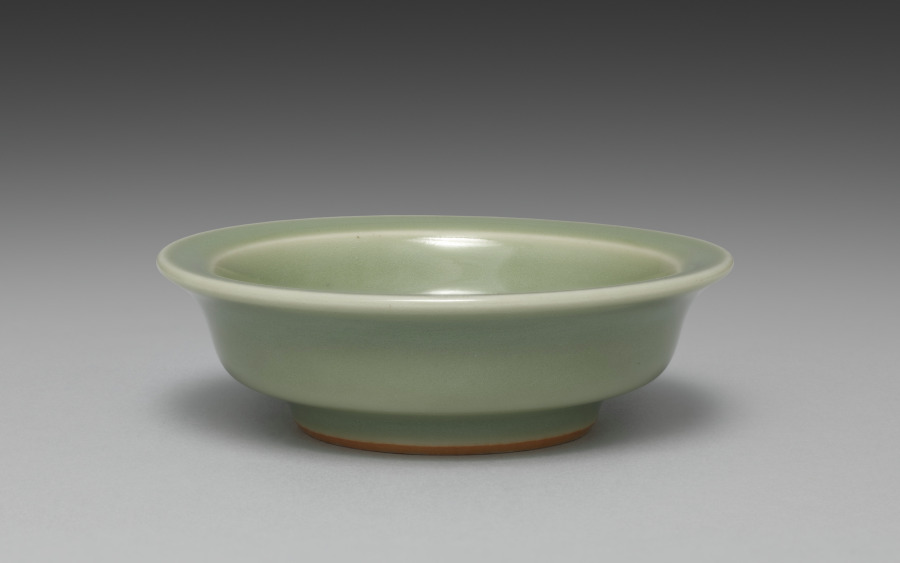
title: Saucer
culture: Japan, Meiji period (1868–1912)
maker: Seifū Yohei III (Japanese, 1851–1914)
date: 1893–1914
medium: One from a set of ten dishes; porcelain with green glaze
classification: Ceramic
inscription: 清風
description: Yohei III’s main output for his sophisticated clientele was in the form of tea sets and dining sets. He created a range of dishes in green glazes. He often produced in pairs, sets of five, or sets of ten. For this set of ten small dishes in a simple, round form that emphasizes the glaze above all, the box lid designates the piece as seiji, or green-glazed porcelain, using a general term for the extensive palette of green glazes often called celadon in English. The box lid further identifies the dishes themselves as tōchō, literally “bean-sized saucers,” a size that makes them suitable for dipping sauces.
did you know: The ten dishes in this set are stored in stacks of five in a two-compartment box.